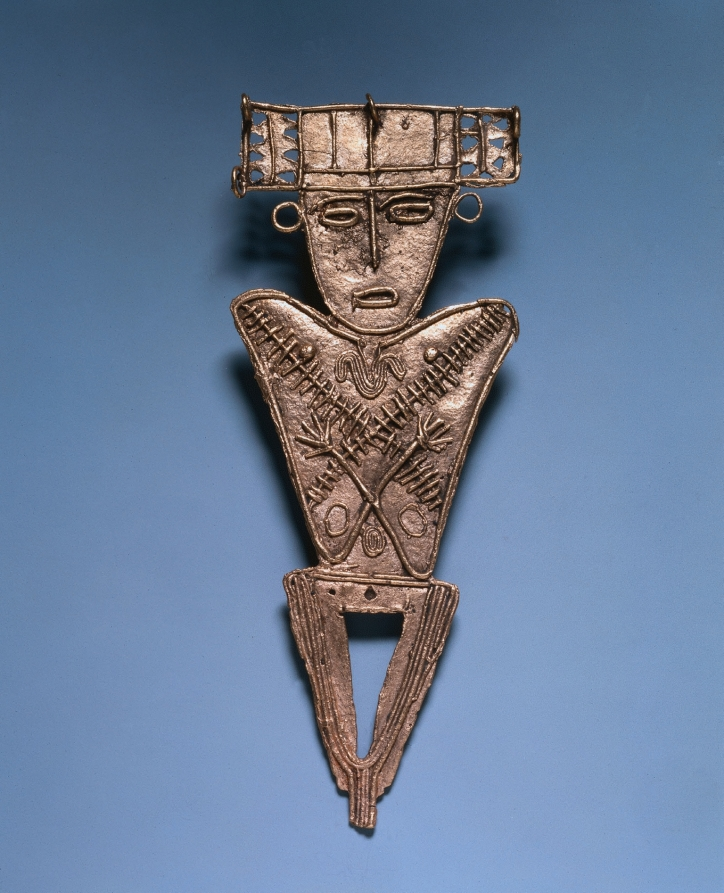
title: Tunjos (Votive Offering Figurine)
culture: Colombia, Muisca style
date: c. 900–1550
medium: cast gold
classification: Metalwork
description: Unlike the other gold ornaments made in the isthmian region, tunjos were not worn; instead, they served as offerings that were deposited in sacred places such as lagoons and caves. They often depict humans who hold something. Perhaps because they were not meant for display, tunjos were not finished after lost-wax casting. Flaws remain uncorrected, surfaces are unpolished, and gold that backed into the channel used to pour the molten metal into the mold was left in place.